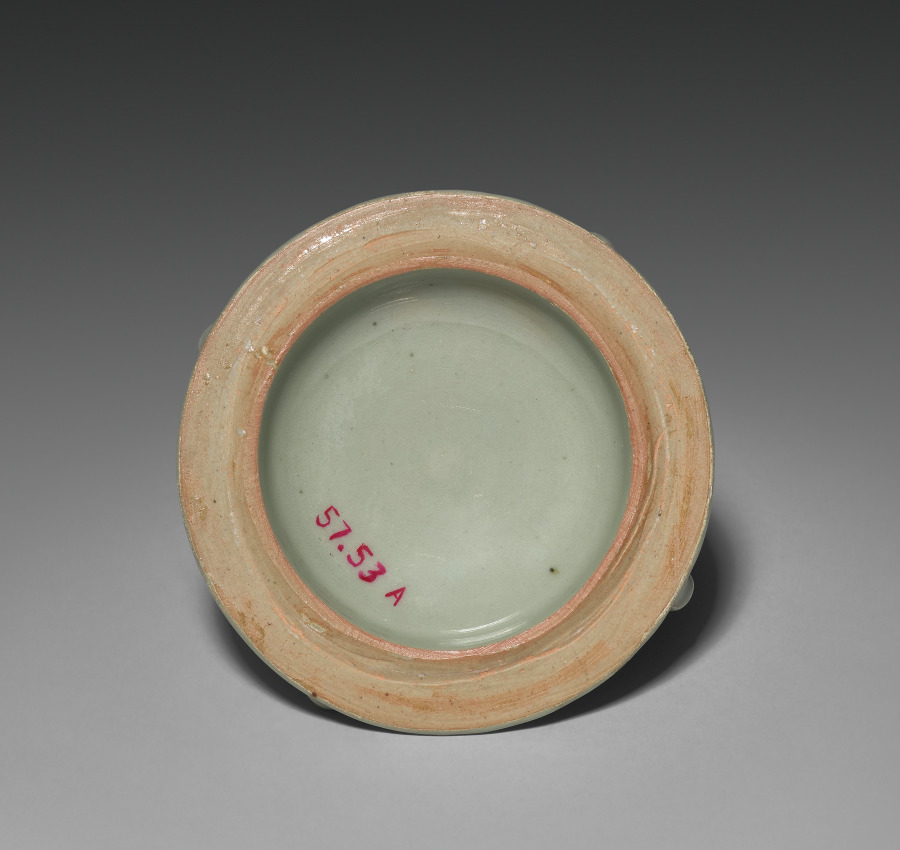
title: Five-Spouted Vase with Cover (cover)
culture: China, Zhejiang province, Longquan region, Northern Song dynasty (960-1127)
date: 1000s-1100s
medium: green-glazed porcelaneous stoneware, Longquan ware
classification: Ceramic